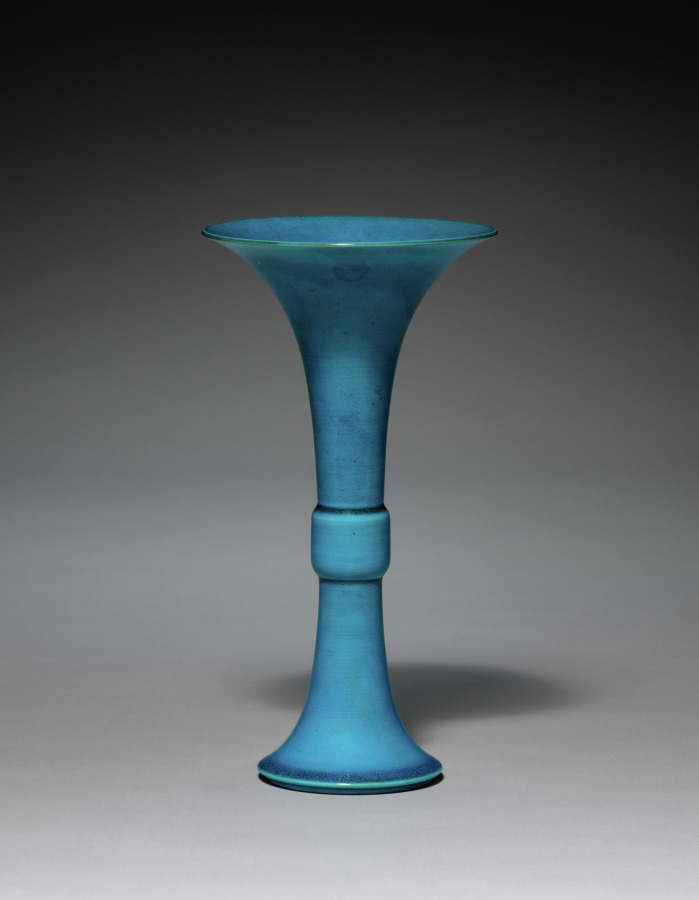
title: Beaker Vase in Form of Archaic Gu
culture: China, Jiangxi province, Jingdezhen kilns, Qing dynasty (1644-1911), Kangxi mark and reign (1662-1722)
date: 1662–1722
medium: porcelain with peacock-blue glaze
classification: Ceramic